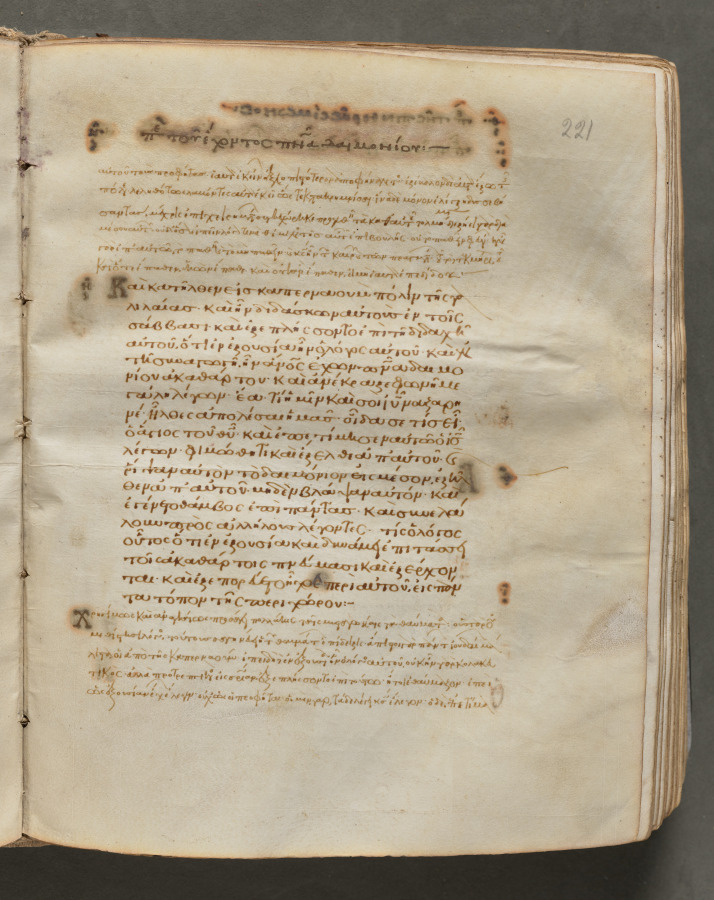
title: Text, folio 221 (recto), from a Gospel Book with Commentaries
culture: Byzantium, Constantinople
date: c. 1000–1100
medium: ink, tempera, and gold on vellum; leather binding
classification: Bound Volume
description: Each of the four gospels in this book opens on a page with brilliantly illuminated borders depicting the author of the text as well as birds-principally peacocks, symbols of the immortality of the soul-and fountains, representing the fountain of life and the salvation of the soul. This volume consists of 428 leaves with texts in Greek. Its level of sophistication suggests that it was probably written and decorated in a monastery in Constantinople.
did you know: Gospel Books were carried in procession through Byzantine churches.